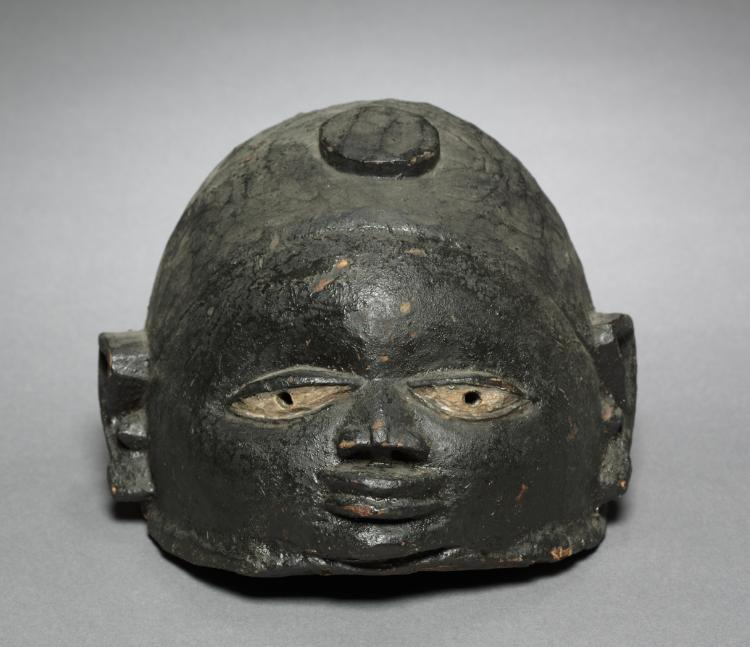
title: Mask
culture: Africa, West Africa, Nigeria, Yorùbá-style maker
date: c. 1910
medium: Wood and paint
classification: Mask